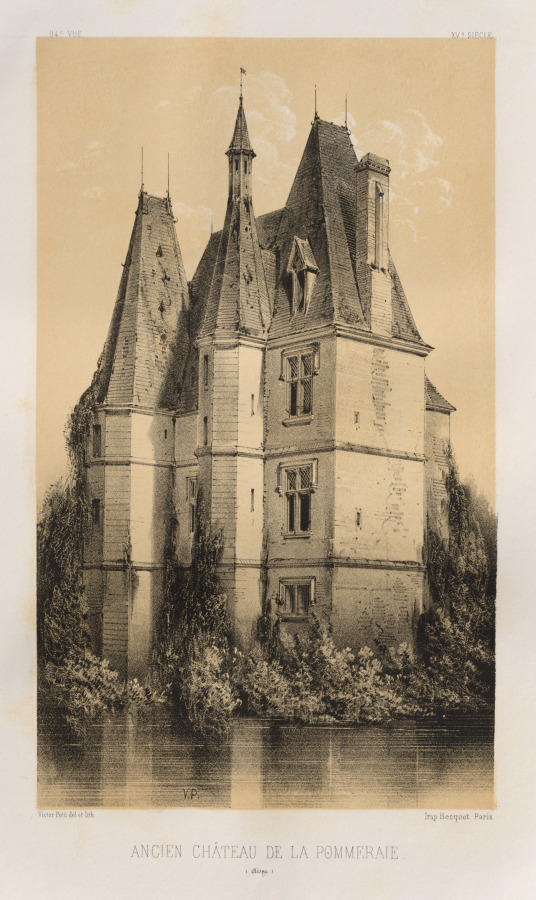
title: Architecture Pittoresque ou Monuments des XVeme. Et XVIeme. Siecles: Chateaux de France des XV et XVI Siecles: Pl. 94, Ancien Château de la Pommeraie (Aisne)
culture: France, 19th century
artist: Victor Petit (French, 1817–1874)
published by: Charles Boivin (publisher and editor); Lith de Godard a Paris (printer)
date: 1860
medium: lithograph with tint stone, from portfolio of 100 lithographs with tint stone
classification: Print